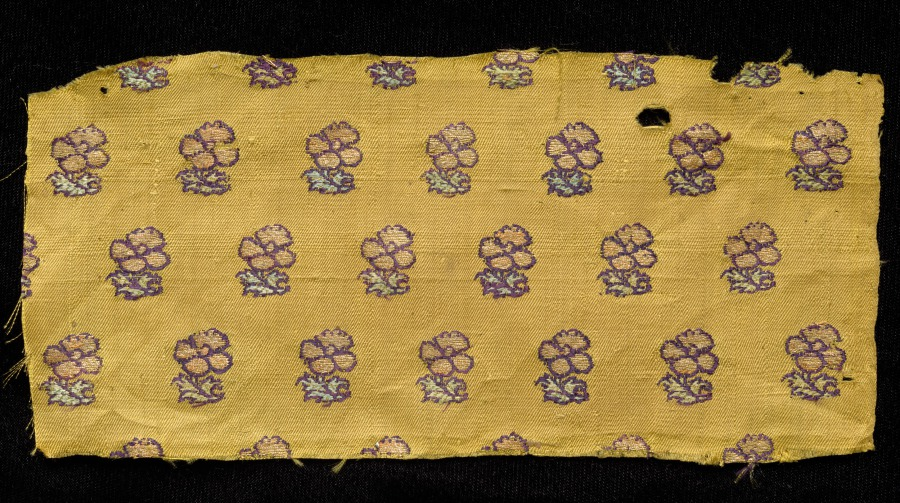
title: Fragment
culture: India, 19th century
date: 1800s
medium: brocade; silk ground with silk and gold thread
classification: Textile